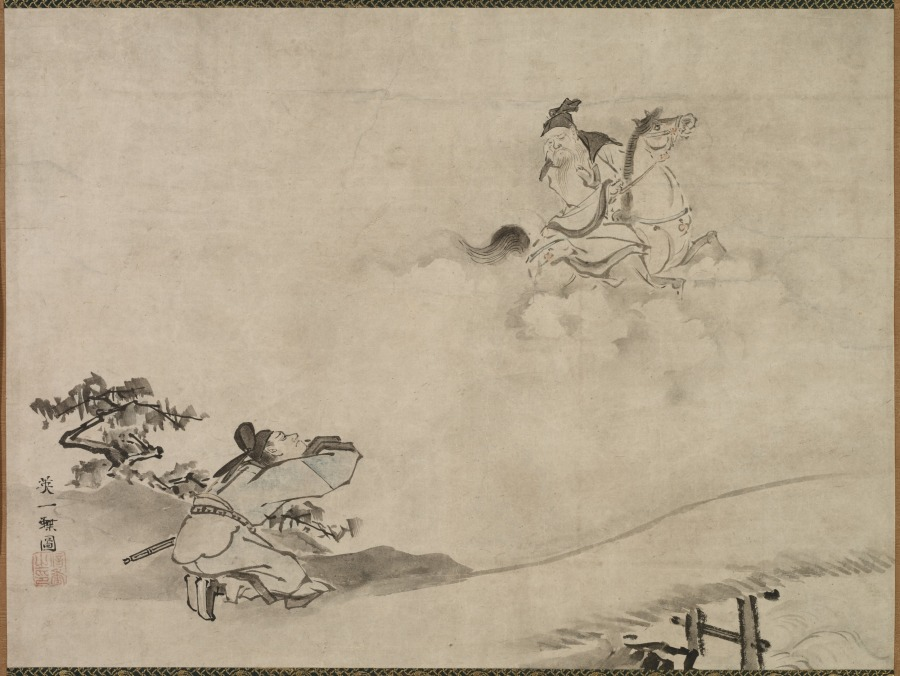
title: Daoist Immortal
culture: Japan, Edo period (1615–1868)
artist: Hanabusa Itchō (Japanese, 1652–1724)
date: 1615–1868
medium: hanging scroll, ink and color on paper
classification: Painting